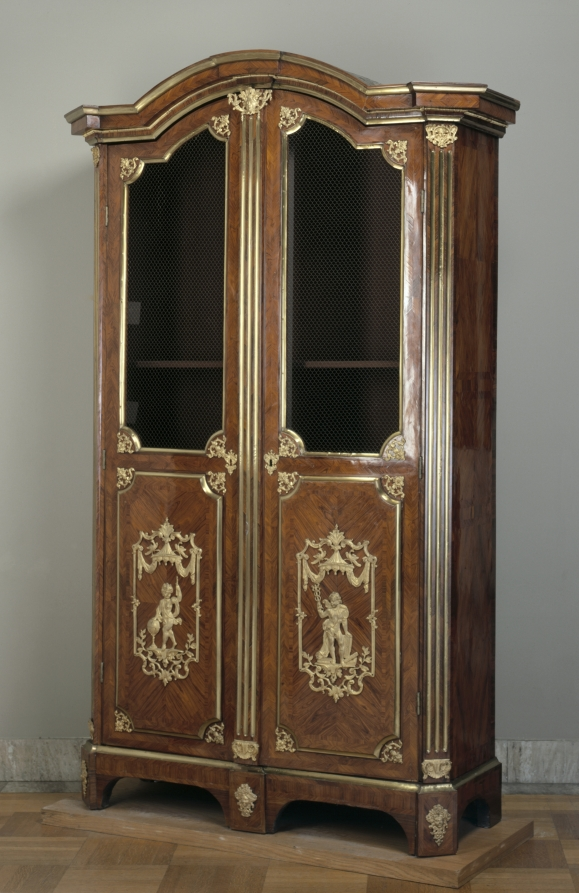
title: Bookcase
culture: France, 18th century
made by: attributed to Charles Cressent (French, 1685–1768)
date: c. 1720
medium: kingwood and rosewood veneers, gilt metal mounts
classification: Furniture and woodwork